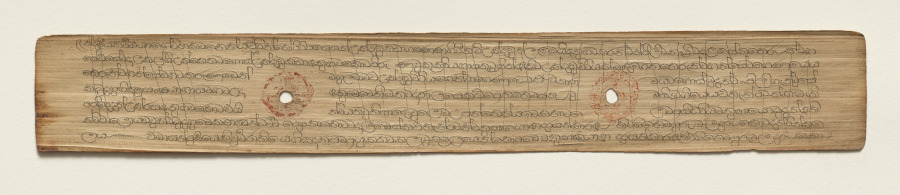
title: Leaf from a Buddhist Manuscript (verso)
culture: Sri Lanka, Singhalese, Late 17th century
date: c. 1700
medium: fiber paper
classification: Manuscript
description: Palm leaf material is still used for manuscripts in Sri Lanka. The palm leaves are prepared first by boiling them, drying them in the sun, and then rubbing them with oils. Scribes then use a metal stylus to incise the text. Then charcoal powder is wiped across the pages, filling in only the inscribed lines.